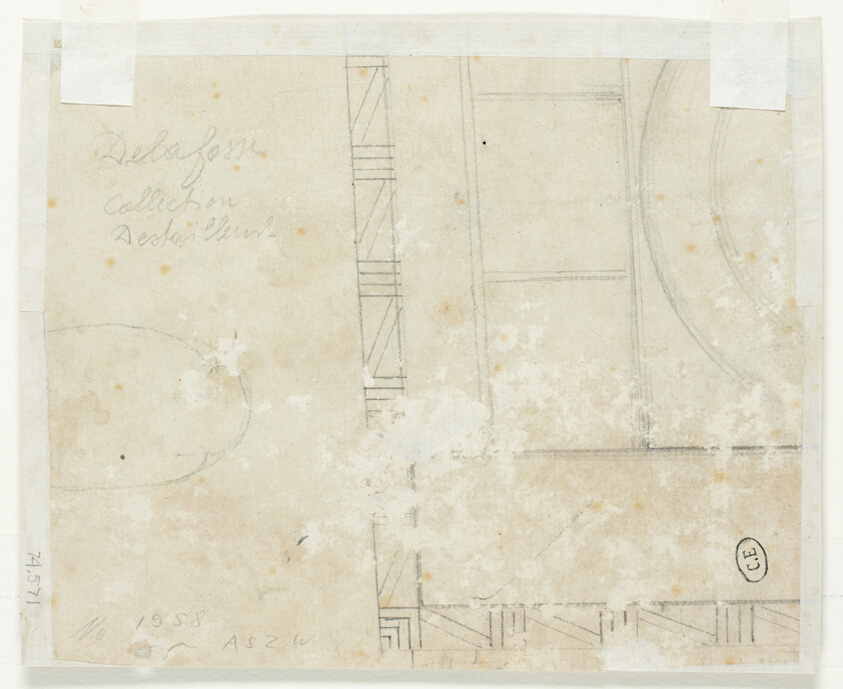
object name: Drawing and Watercolor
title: Ornament with Two Bull's Heads (recto); Sketch of Geometric Borders (verso)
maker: Attributed to Jean Charles Delafosse (French, 1734-1789); or the school of Perino del Vaga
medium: Brush and black ink and gray wash, with traces of graphite (recto), and graphite (verso), on ivory laid paper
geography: France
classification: ink or chalk wash; drawings (visual works); prints and drawing